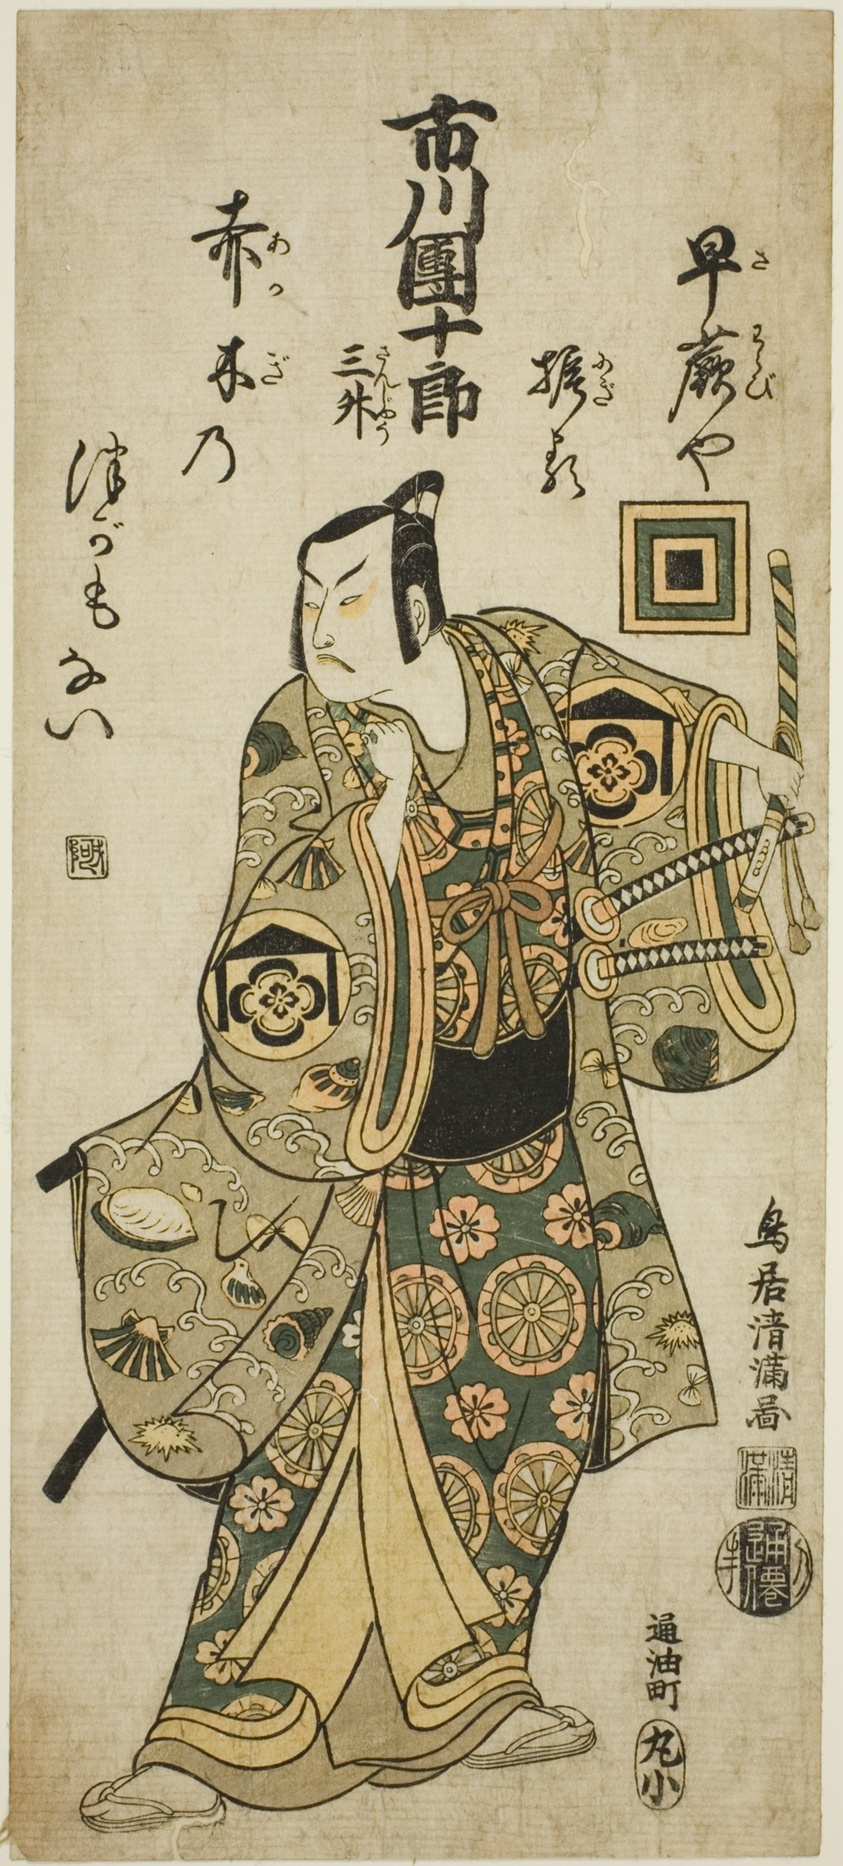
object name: Print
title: The Actor Ichikawa Danjuro IV as Kudo Suketsune in the play "Hatsugai Wada no Sakamori," performed at the Nakamura Theater in the first month, 1759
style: Japanese (culture or style)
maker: Torii Kiyomitsu I (Japanese, 1735–1785)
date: 1759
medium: Color woodblock print; o-hosoban, benizuri-e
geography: Japan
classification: woodblock print; print; asian art